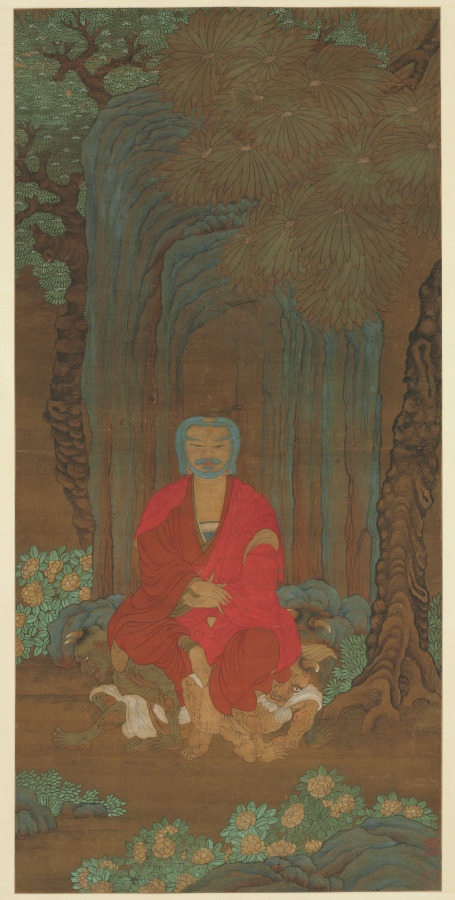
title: Shakyamuni under the Bodhi Tree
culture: China, Ming dynasty (1368–1644)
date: 1600–1650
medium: hanging scroll; ink and color on silk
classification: Painting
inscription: Artist's seal(?): Ta-fang-chih. 1 additional seal of Chiao Ping (dates unknown)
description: The historical Buddha Shakyamuni is seated in meditative posture upon the backs of three demons under the bodhi tree, where he achieved enlightenment. All three demons have horns like devils, and two have green skin. While they accommodate the Buddha, his weight seems to keep them under control. Since the Buddha’s hands do not conform to any accepted gesture, the specific religious event portrayed is unclear.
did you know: The blue-green style and grotesque goblins suggest an otherworldly sphere.